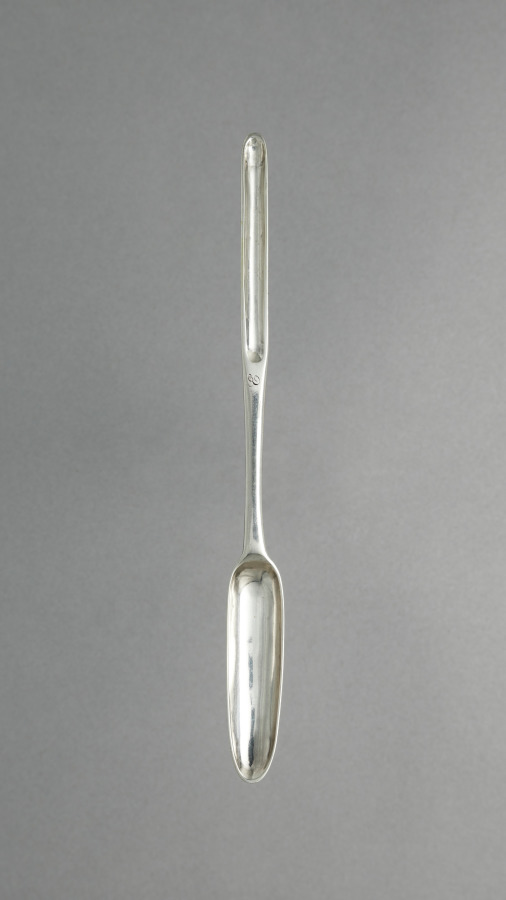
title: Marrow Scoop/Spoon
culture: America, Pennsylvania, Philadelphia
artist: attributed to Joseph Richardson (American, 1752–1831)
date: c. 1790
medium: silver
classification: Silver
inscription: engraved "MDL" in bright-cut script on back of larger scoop, and "E" in script on top of joint above smaller scoop.